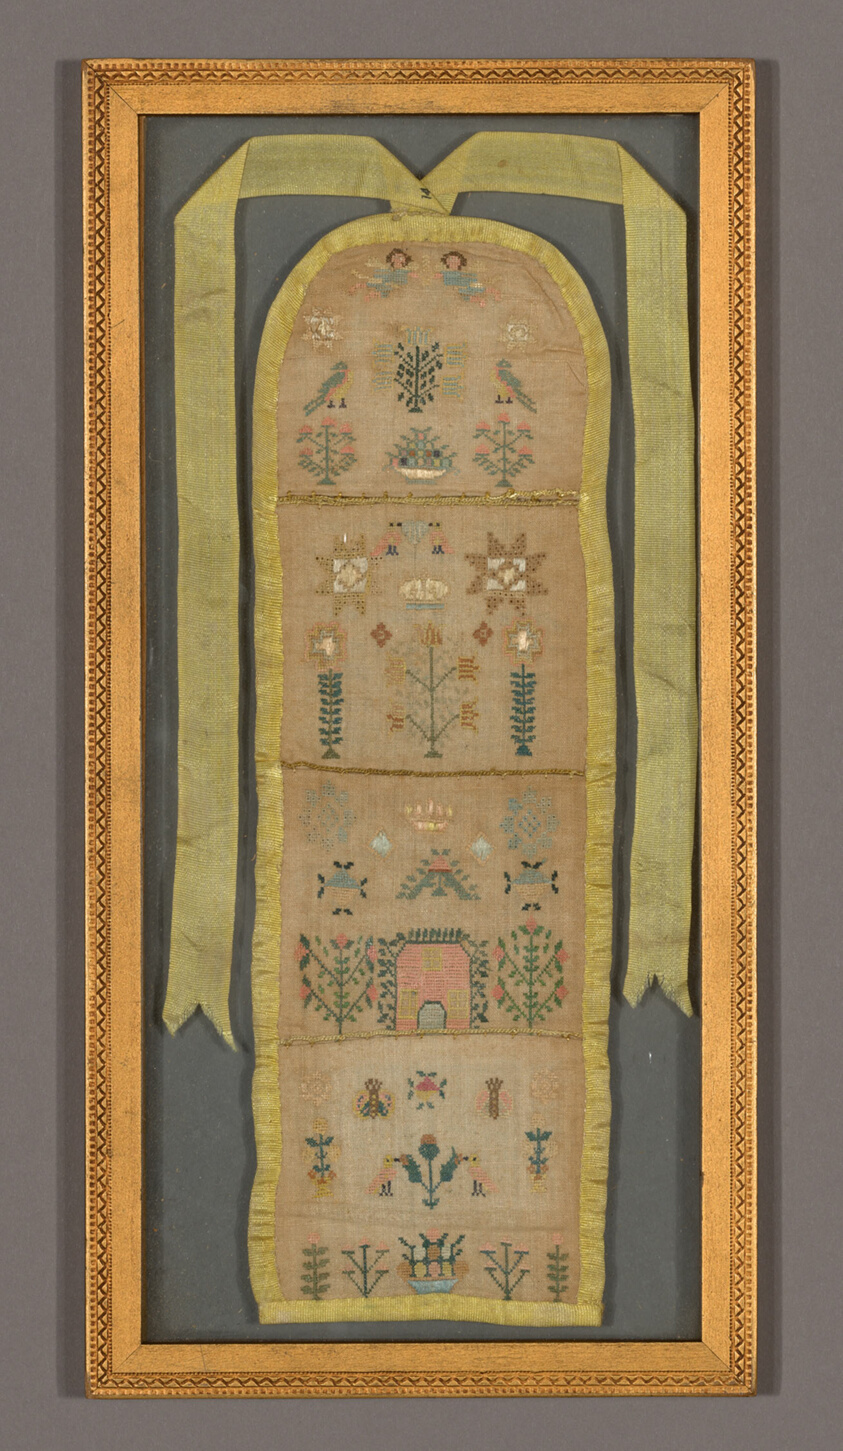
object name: Textile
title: Sampler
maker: Worked by Elizabeth Dudley (English, active c. 1799); England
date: 1799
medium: Linen, plain weave; embroidered with silk in cross, satin, algerian eye or star stitches, detached buttonhole insertions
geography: England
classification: textile; needlework (visual works)